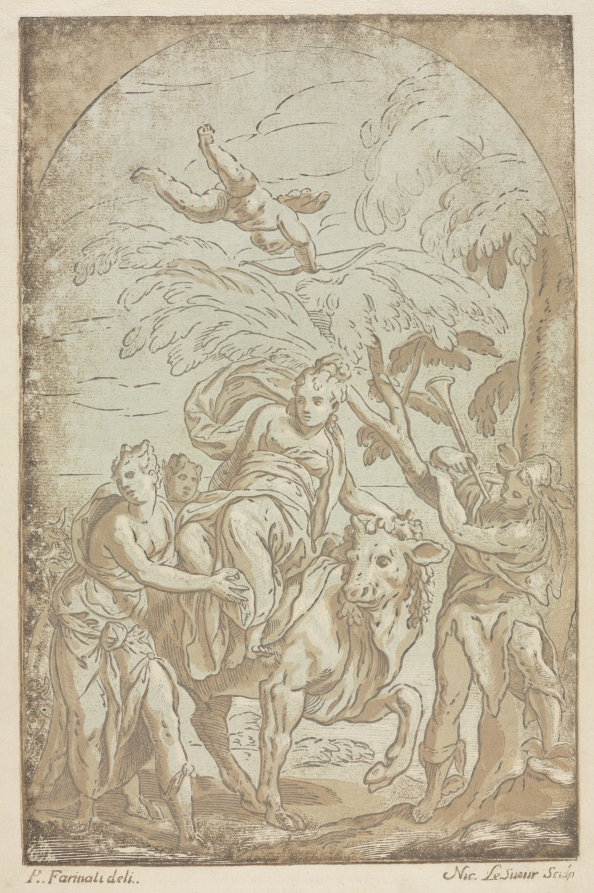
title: The Rape of Europa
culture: France, 18th century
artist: Nicolas LeSueur (French, 1691–1764)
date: 1725–42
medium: chiaroscuro woodcut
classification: Print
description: Whereas in the 16th and 17th centuries chiaroscuro woodcuts were the artist's original conception or copies of contemporaneous designs, in the 18th century the technique often served to replicate the most famous masterworks of the past, especially of 16th-century Italy. During the 1700s, chiaroscuro woodcuts were directly connected to famous art collections and depended on the support of wealthy patrons. Le Sueur produced numerous chiaroscuros for the Cabinet Crozat, two volumes published in 1729 and 1742 by Count Anne Claude Philippe de Caylus and Pierre Crozat. The books reproduced famous paintings and drawings in French collections. For most of Le Sueur's chiaroscuros for this project, the black lines were printed from etched metal plates prepared by others, instead of from a woodblock. However, he did cut all four blocks for The Rape of Europa himself.